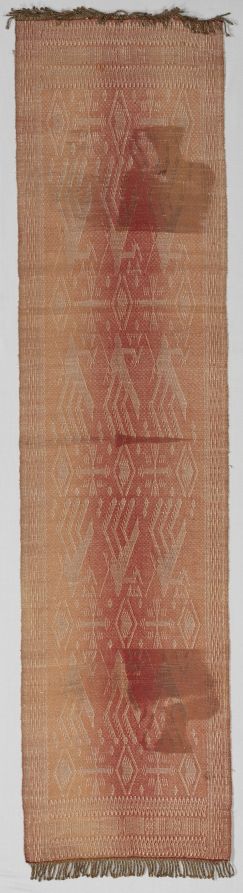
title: Slendang (Shoulder Cloth)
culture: Indonesia, Central Java, 19th century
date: 1800s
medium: batik; cotton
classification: Textile